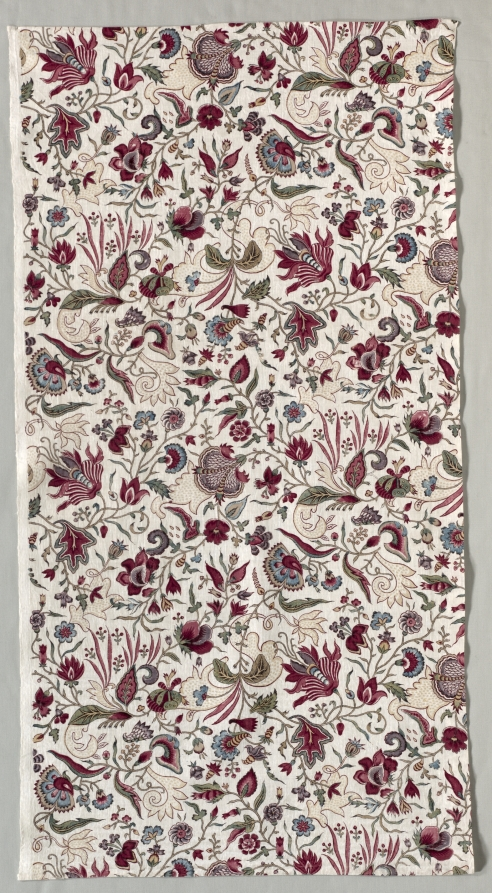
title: Fragment of a Quilted Skirt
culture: England, late 18th century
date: c. 1785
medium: woodblock print on cotton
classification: Textile